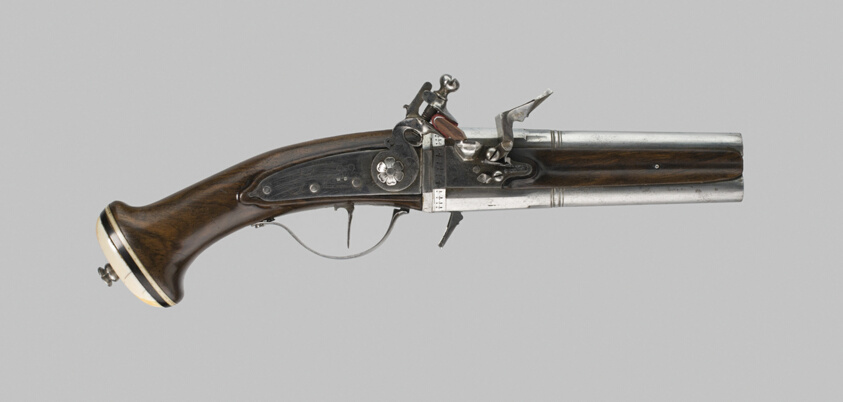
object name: Arms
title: Double-Barrel Revolving Flintlock Pocket Pistol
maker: Lock signed Henri Suber; French, Marseilles 17th century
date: c. 1650/60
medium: Steel, wood, and ivory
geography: France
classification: firearm-handgun; arms; arms and armor